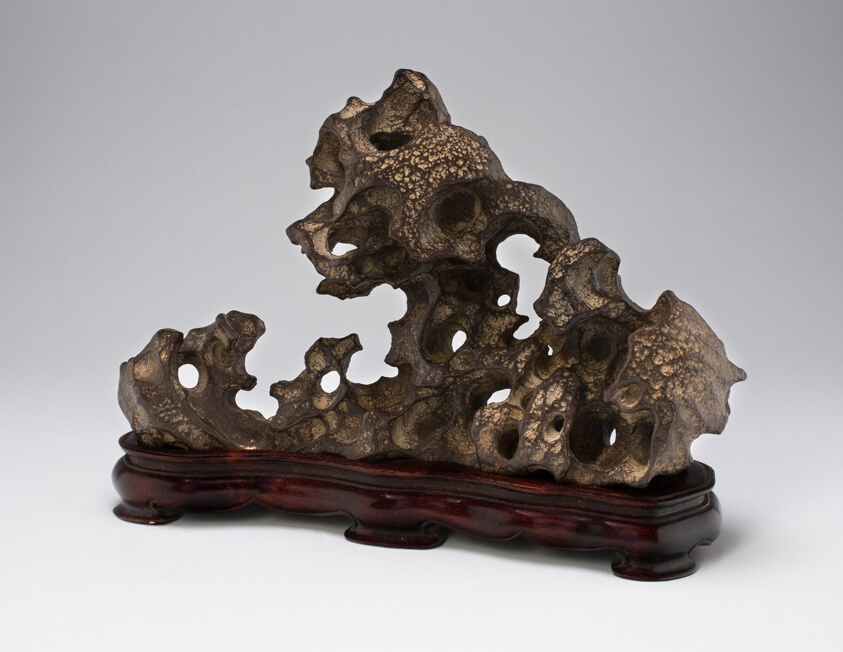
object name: Decorative Arts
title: Scholar's Rock or Brushrest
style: Chinese (culture or style), qing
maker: China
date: Qing dynasty (1644–1911), 18th century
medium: Stone (probably Lingbi stone)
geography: China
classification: asian art; stone (unidentified); sculpture/stone; decorative arts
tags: religion